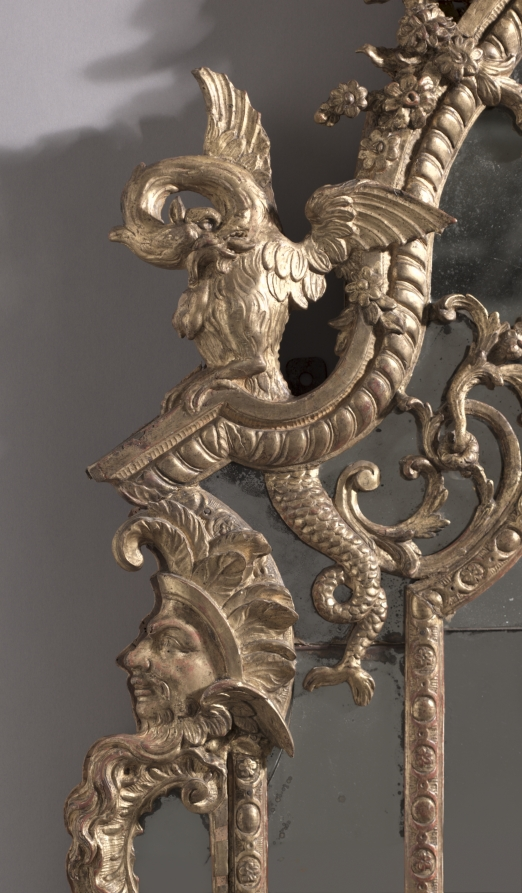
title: Wall Mirror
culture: France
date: c. 1720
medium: carved and gilded wood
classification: Furniture and woodwork